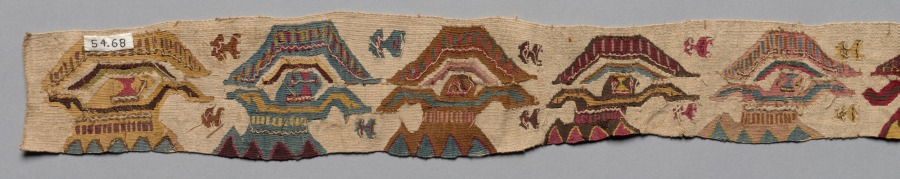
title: Lower Border of a Garment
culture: Central Andes, North Coast, Chimú or Lambayeque (Sican) People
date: 1000–1470s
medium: tapestry; wool and cotton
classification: Textile